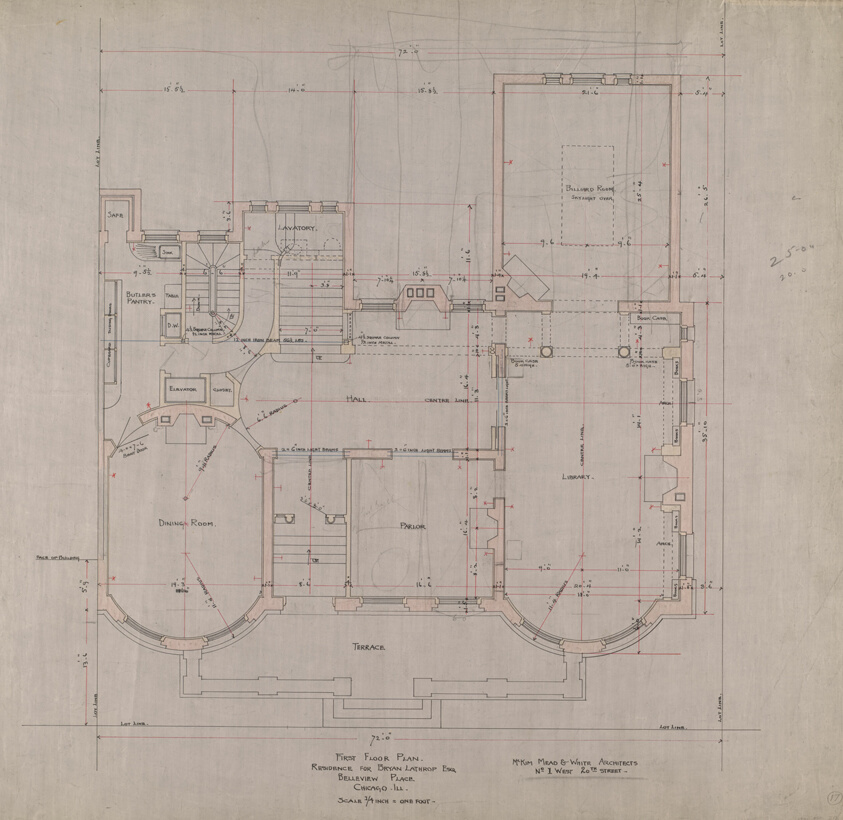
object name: Architectural Drawing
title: Bryan Lathrop House, Chicago, Illinois, First Floor Plan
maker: McKim, Mead and White; American, 1879-1919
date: c. 1892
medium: Graphite on linen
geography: Chicago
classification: working drawing; architectural drawing